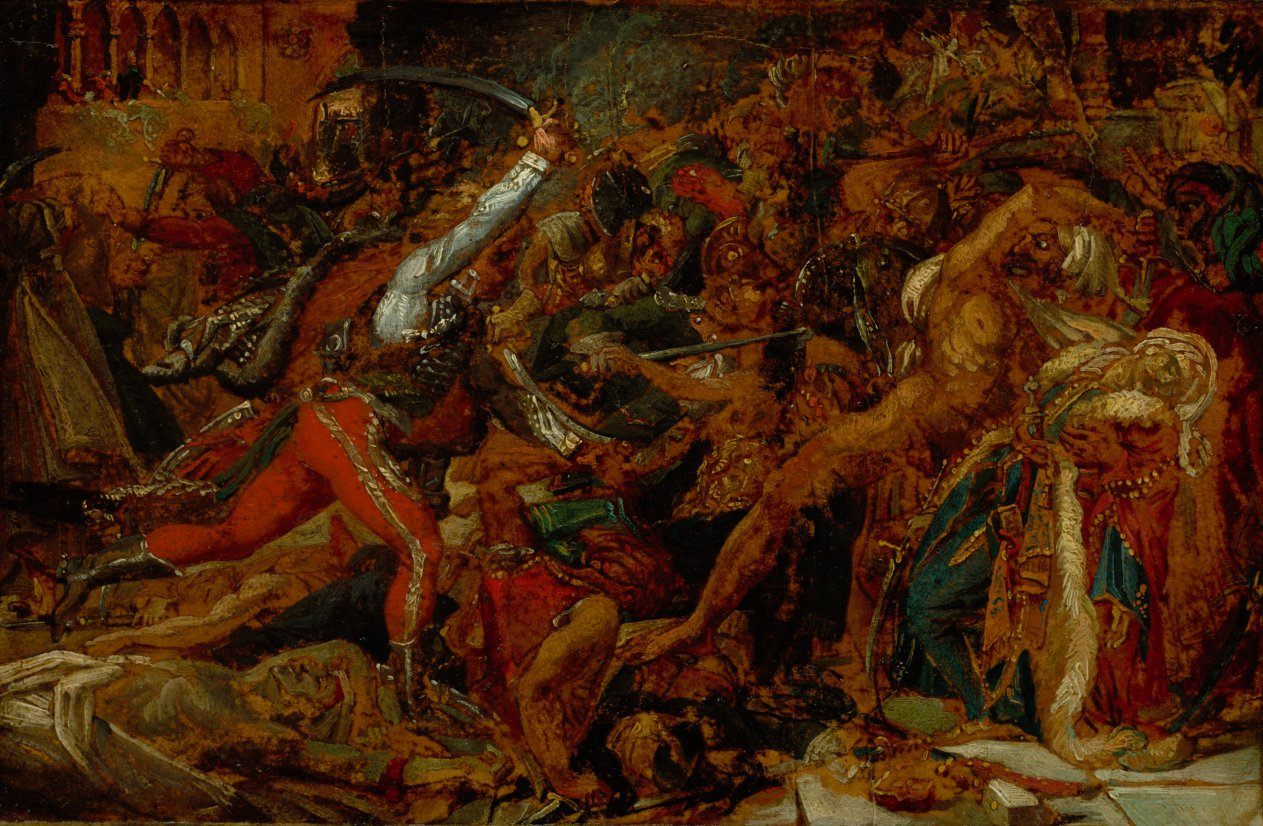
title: Sketch for "The Revolt at Cairo"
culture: France, 19th century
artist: Anne-Louis Girodet de Roucy-Trioson (French, 1767–1824)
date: c. 1809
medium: oil on paper, mounted on paper and canvas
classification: Painting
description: Throughout the 1800s and into the 1900s, prints, paintings, and photographs, like Louis Haghe’s Egypt and Nubia series, brought back by artists who voyaged to Egypt, inspired American and European artists, architects, and designers to emulate ancient Egyptian motifs and styles. Egyptomania blossomed through the 1800s and can be seen in architecture around cities like Washington, DC, and in the interiors of aristocratic homes, as well as in funerary monuments, such as in Lake View Cemetery in Cleveland, Ohio. Looking back at these creations provides an interesting historical groundwork for debating who has the right to interpret Egyptian motifs and styles.